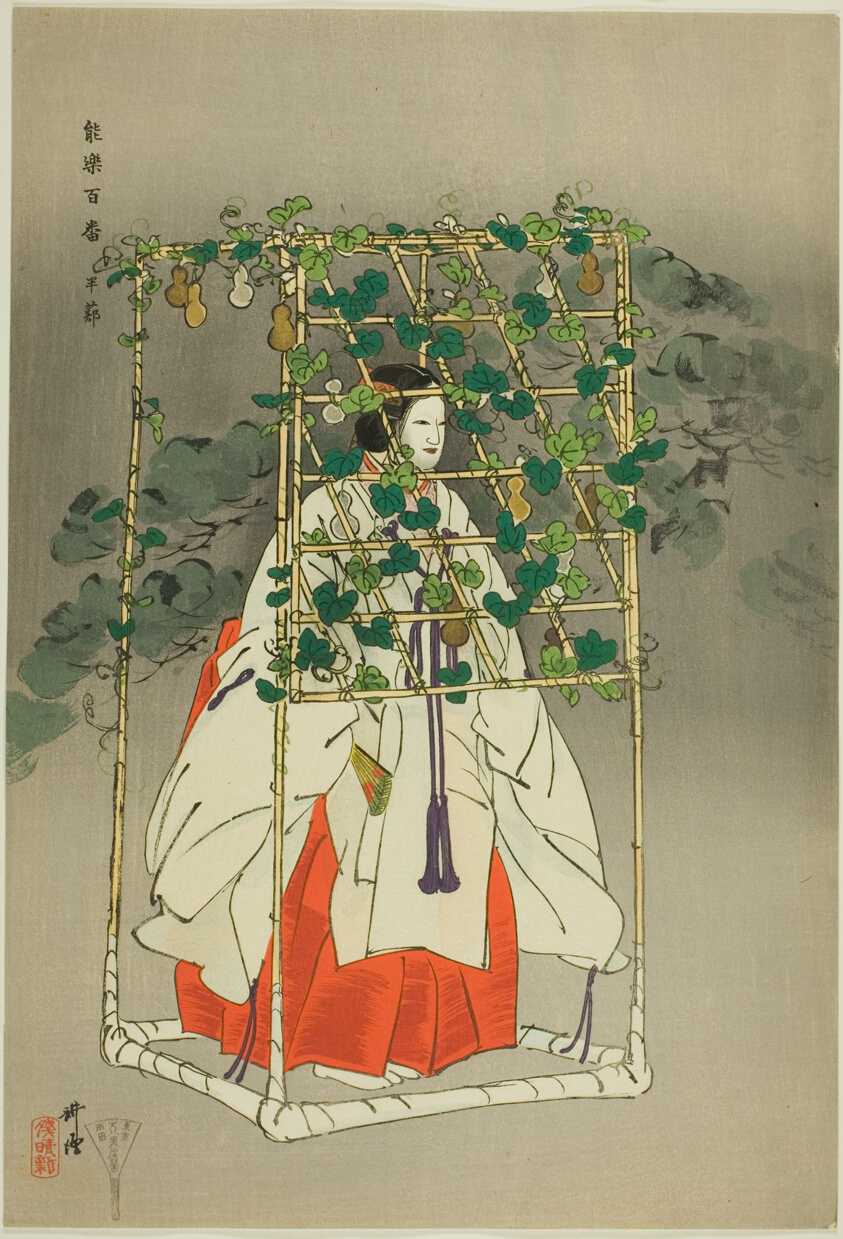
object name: Print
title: Hashitomi, from the series "One Hundred No Dramas (Nogaku hyakuban)"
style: Japanese (culture or style)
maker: Tsukioka Kogyo; Japanese, 1869-1927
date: 1898/1903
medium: Color woodblock print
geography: Japan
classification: woodblock print; print; asian art